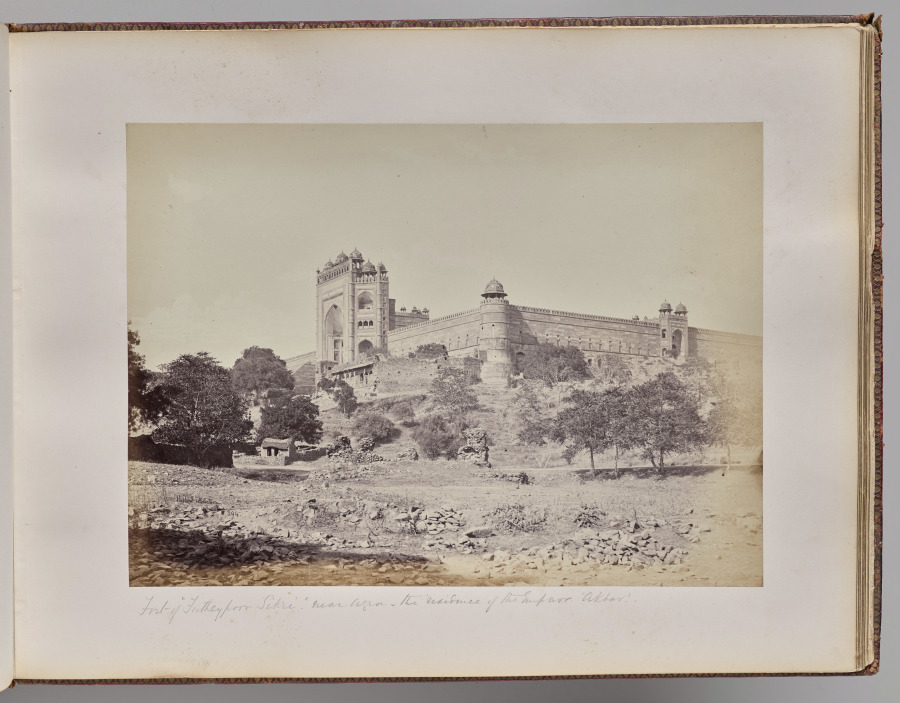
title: Fort of Futheypoor Sikre near Agra. The Residence of the Emperor Akbar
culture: England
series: Photographs of Northern India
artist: Samuel Bourne (British, 1834–1912)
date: 1863–70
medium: albumen print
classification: Photograph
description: The 50 images in this album, all taken in the 1860s, move from the hill towns of the Himalayas down to cities including Lahore (now in Pakistan), Delhi, Lucknow, Agra, Benares (now Varansi), and Calcutta (now Kolkata). Architectural studies of major monuments offer valuable historical records of what sites such as the Taj Mahal and the imperial mosque of the Mughal emperors in Delhi looked like before twentieth-century restorations.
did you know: Samuel Bourne, the author of most the images in this album, was a banker in England before he moved to India to become a professional photographer.